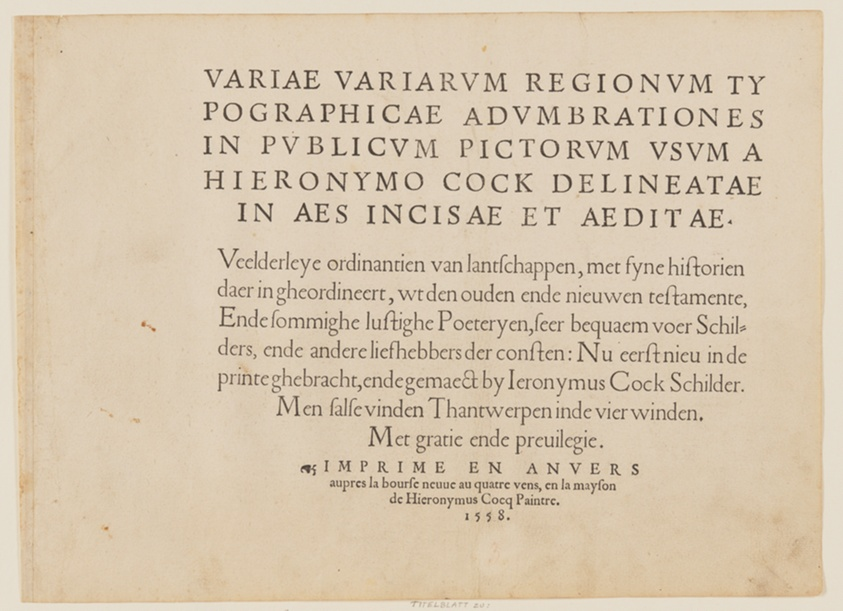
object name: Print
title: Title Page, from Landscapes with Biblical and Mythological Scenes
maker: Hieronymus Cock (Netherlandish, c. 1510–1570); after Matthys Cock (Netherlandish, c. 1505-1548)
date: 1558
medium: Letterpress on ivory laid paper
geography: Netherlands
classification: letterpress; paper; print; prints and drawing